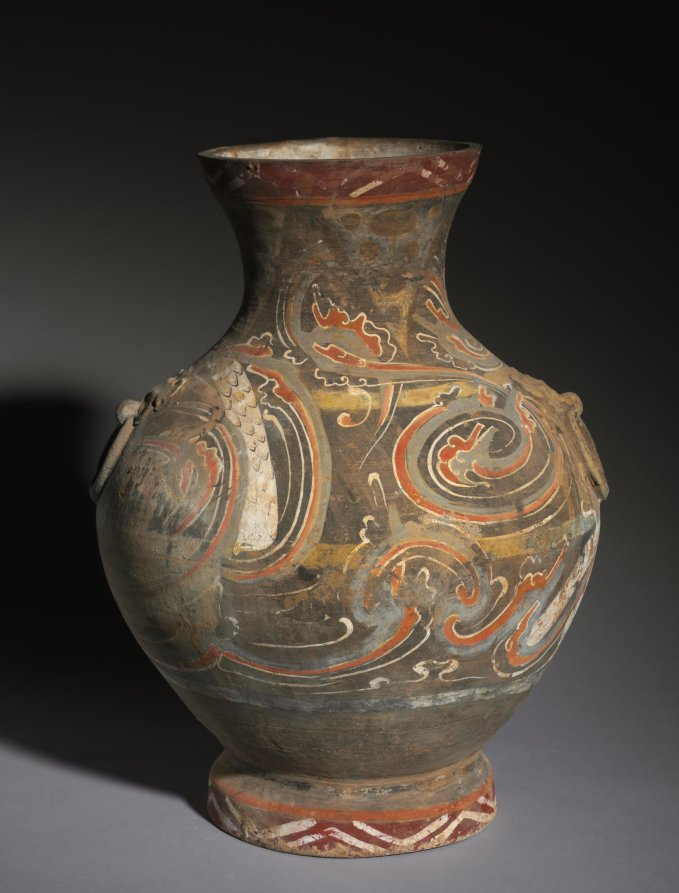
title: Jar (Hu)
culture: China, probably Henan province, Western Han dynasty (206 BCE–8 CE)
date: 202 BCE–9 CE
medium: earthenware with slip and painted decoration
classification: Ceramic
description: Instead of depicting a real landscape, the artist focused on the rhythmic forces of nature and the movement of energy, using the scrolling form as a symbol common to all changes in nature: cloud vapors, waves, and mountains alike. Here a dragon hovers among sweeping scrolls.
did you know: This earthenware wine jar's shape mimics costly bronzes, but the handles have rings that are fixed to the surface of the pot, rendering them useless.